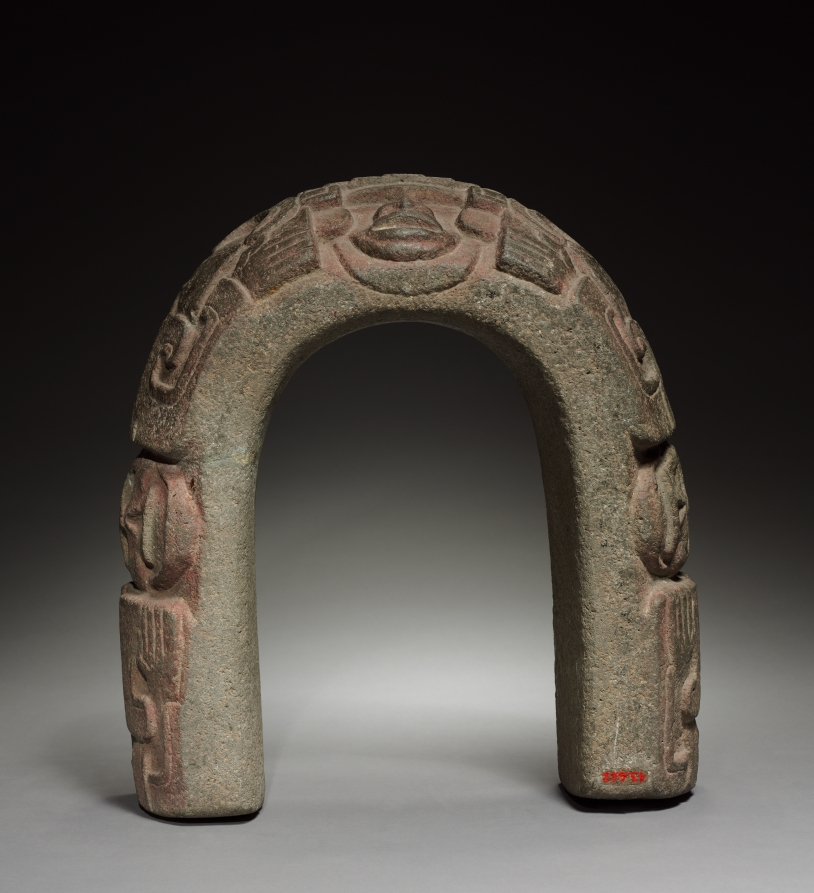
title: Yoke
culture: Mexico, Classic Veracruz Style, 7th-10th Century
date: c. 600–900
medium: stone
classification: Sculpture